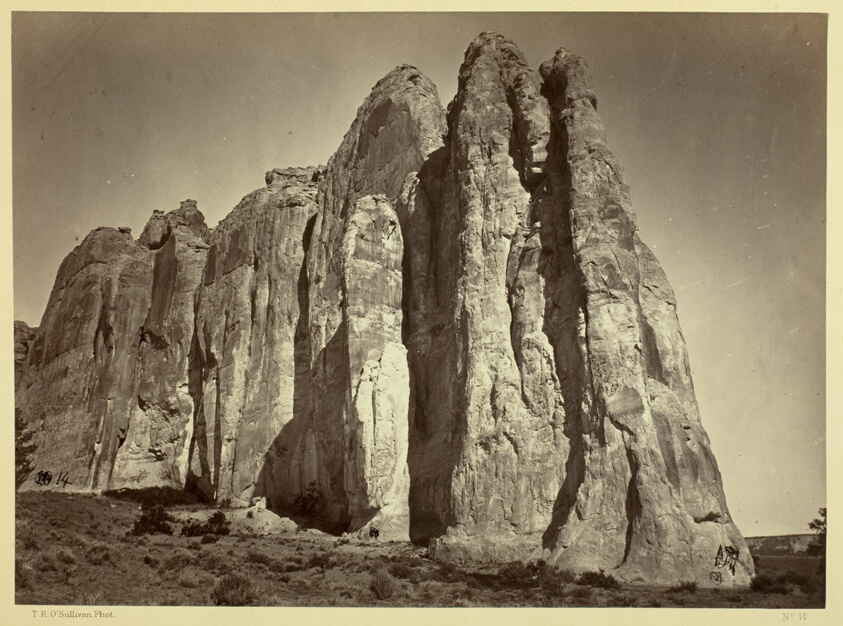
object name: Photograph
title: The South Side of Inscription Rock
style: 19th century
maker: Timothy O'Sullivan (American, born Ireland, 1840–1882)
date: 1873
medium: Albumen print, from the album "Geographical & Geological Explorations & Surveys West of the 100th Meridian," vol. 2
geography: United States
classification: albumen print from collodion negative; photograph; photography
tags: Collected by Hugh Edwards